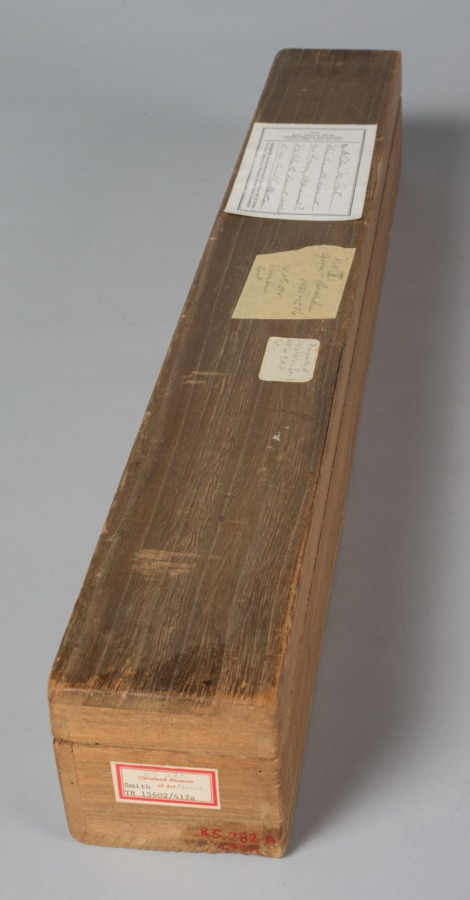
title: Goose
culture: Japan, Edo period (1615–1868)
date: c. 1615–99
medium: hanging scroll; ink on paper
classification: Painting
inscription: spurious seal of Sesshu, lower right.